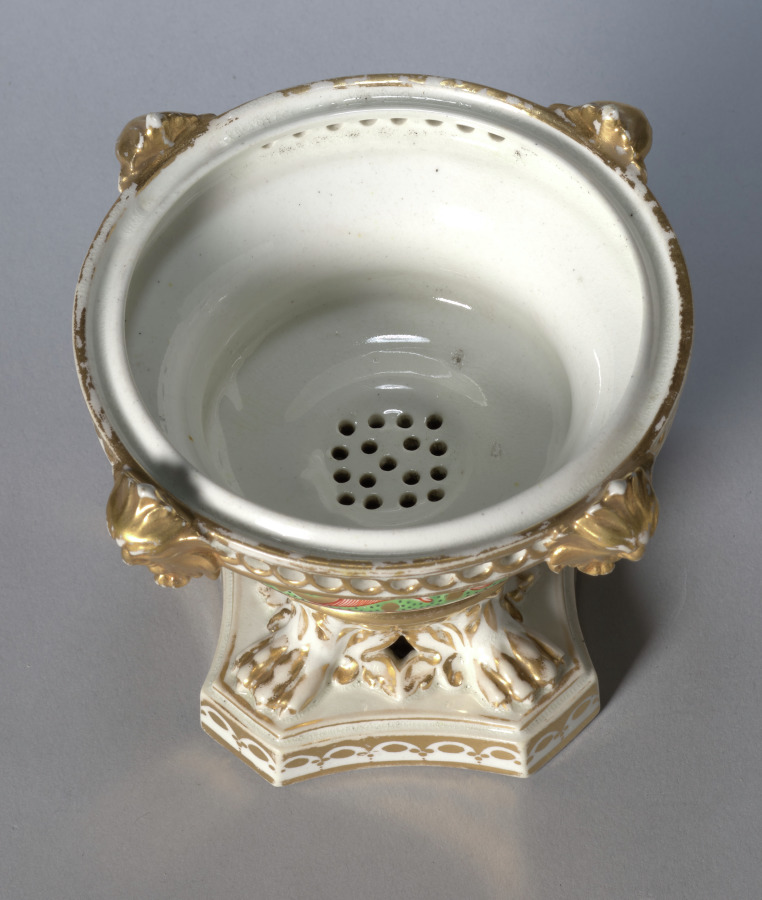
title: Potpourri Vase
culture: England, Derby, 19th century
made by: Derby (Crown Derby Period) (British)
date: c. 1810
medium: porcelain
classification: Ceramic